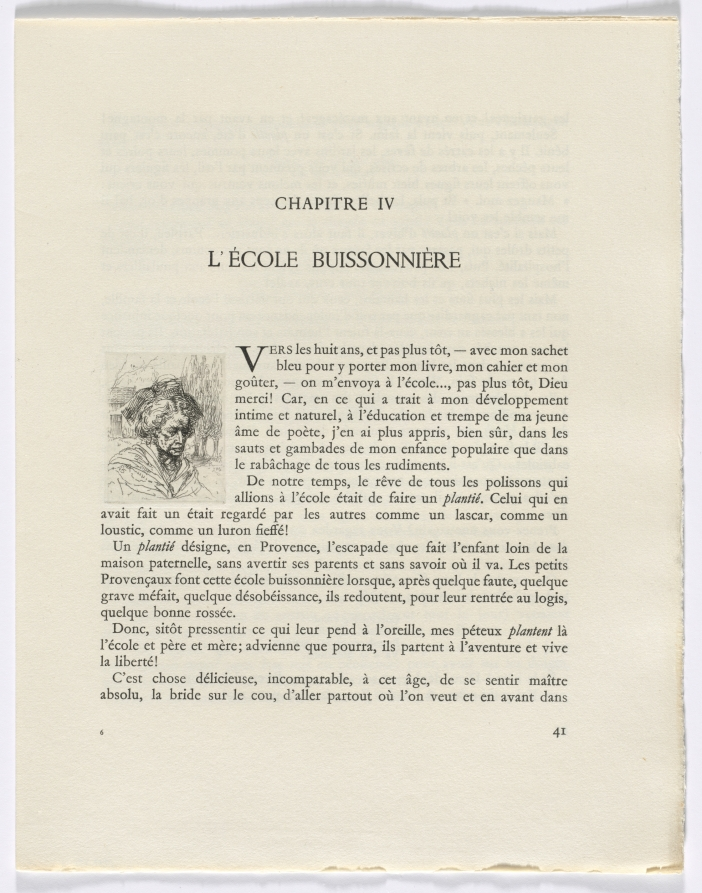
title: Frédéric Mistral: Mémoires et Recits by Frédéric Mistral: bust of a woman (page 41) DUPLICATE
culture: France, 20th century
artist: Auguste Brouet (French, 1872–1941)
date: 1937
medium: etchings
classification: Portfolio